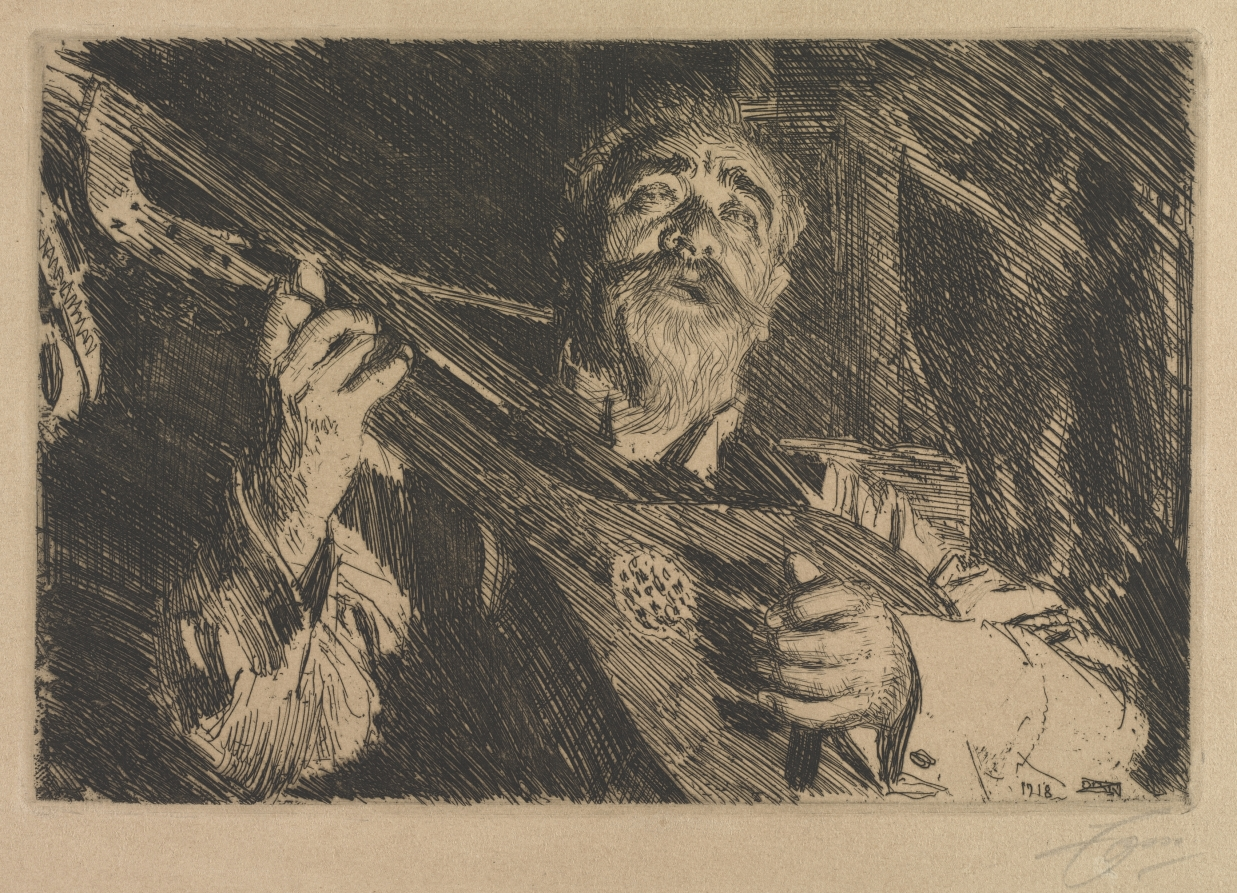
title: Vicke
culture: Sweden, 20th century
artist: Anders Zorn (Swedish, 1860–1920)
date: 1918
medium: etching and drypoint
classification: Print